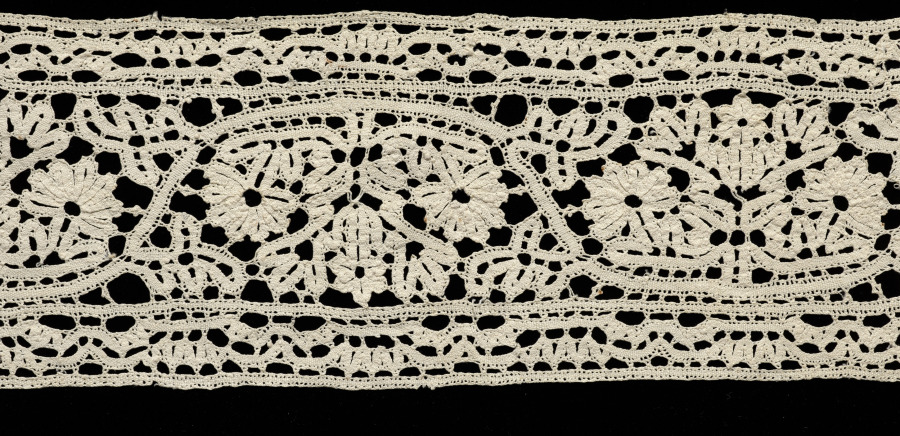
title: Lace Insertion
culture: Italy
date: 1600s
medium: Bobbin lace (tape lace)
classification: Lace